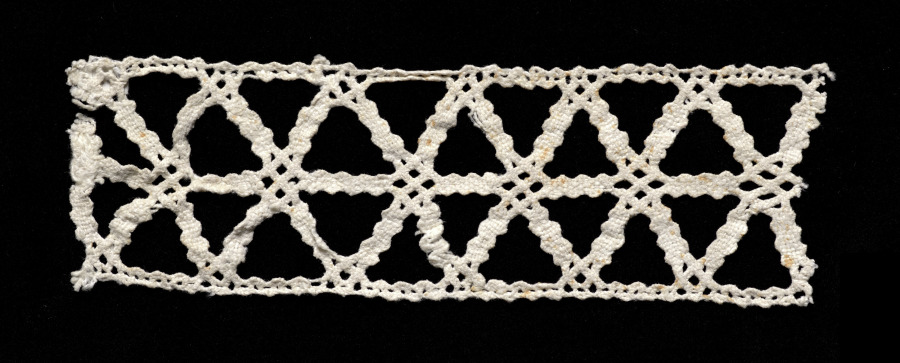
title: Lace Insertion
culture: Italy, Abruzzi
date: 1700s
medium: Bobbin lace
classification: Lace